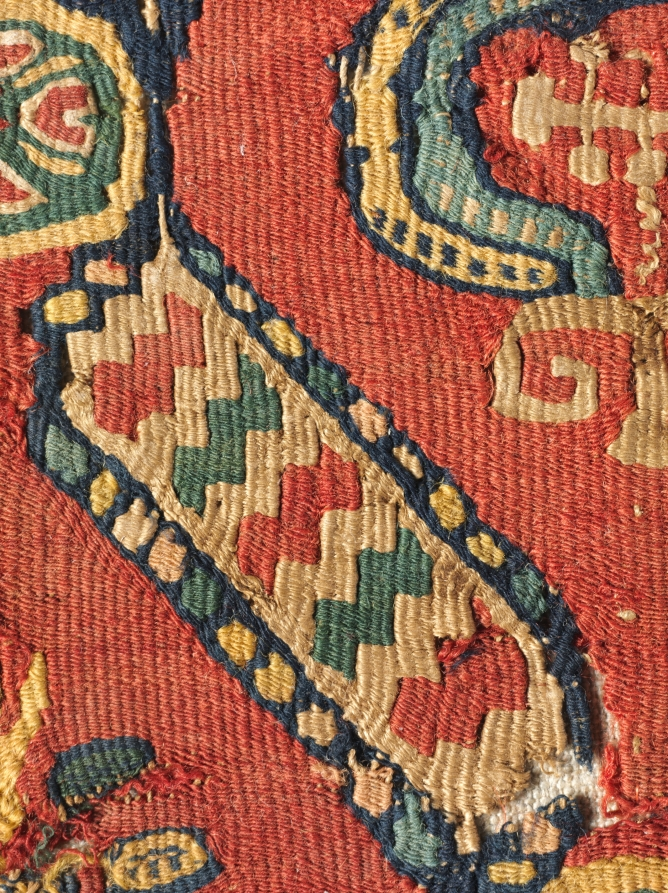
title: Fragmentary Ornament from a Tunic with Lozenges and Medallions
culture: Egypt, Abbasid period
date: mid 700s - mid 800s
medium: tapestry weave; wool and linen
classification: Textile